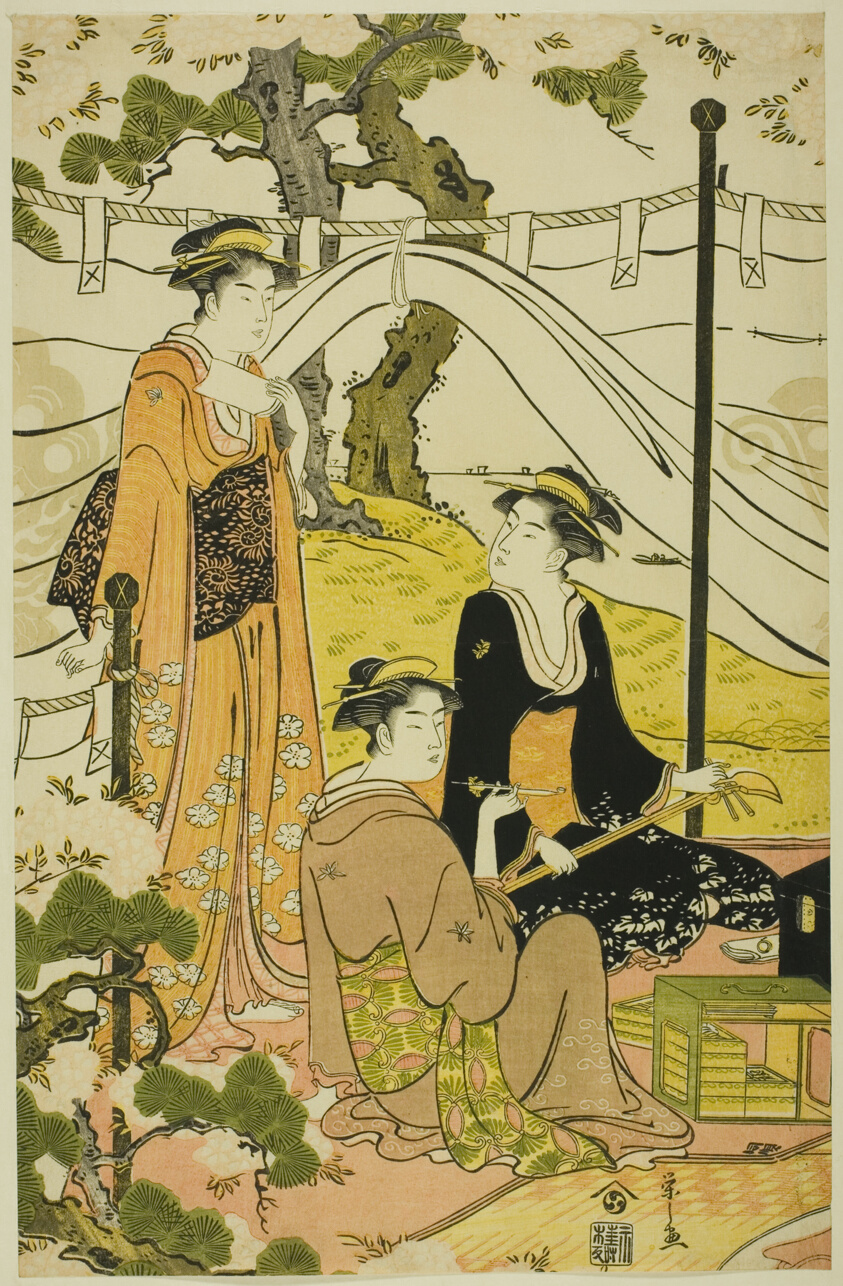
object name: Print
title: Viewing Cherry Blossoms at Goten Hill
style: Japanese (culture or style)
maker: Chobunsai Eishi; Japanese, 1756-1829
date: c. 1787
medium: Color woodblock print; left sheet of oban triptych (right sheet: 1925.3091)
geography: Japan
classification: woodblock print; print; asian art